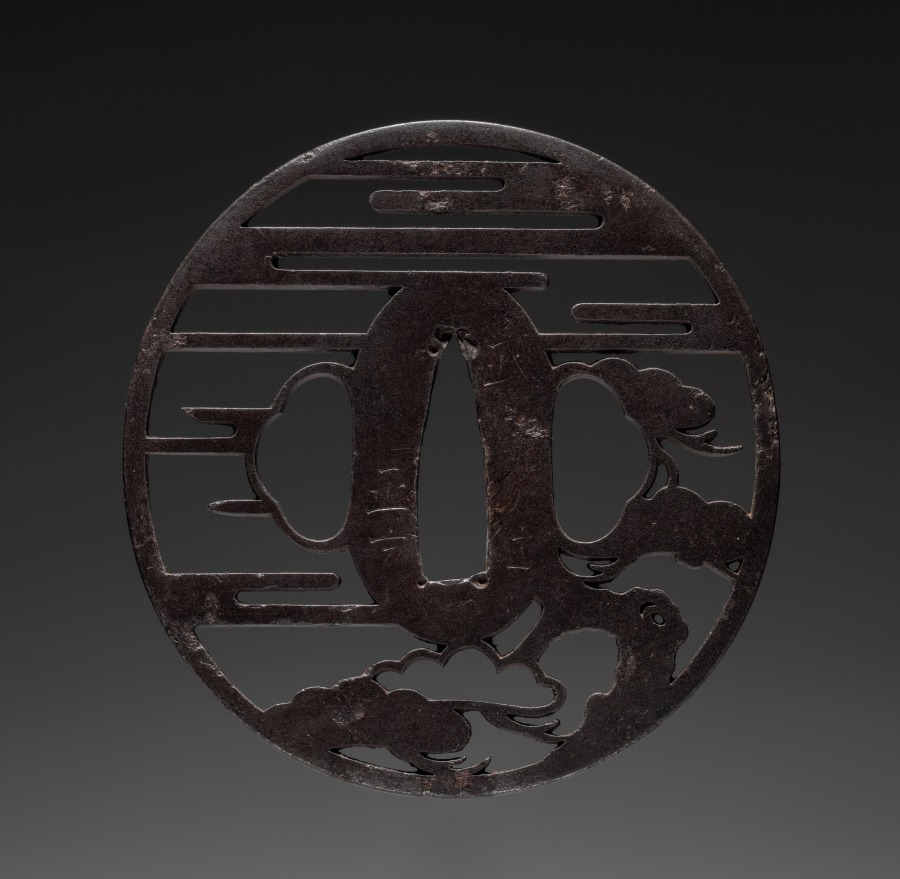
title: Sword Guard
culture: Japan, Edo period (1615–1868)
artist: Masakata (Japanese)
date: early 1800s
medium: iron (Ito type)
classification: Arms and Armor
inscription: Signature: Masakata, residing in Musashi province